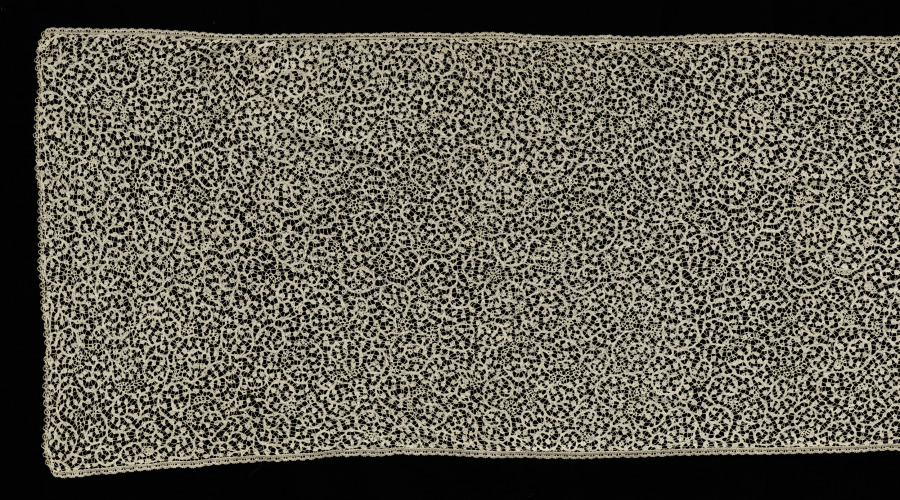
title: Lace Flounce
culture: Flanders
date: 1700s–1800s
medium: Linen: bobbin lace (resembles coralline point)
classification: Lace